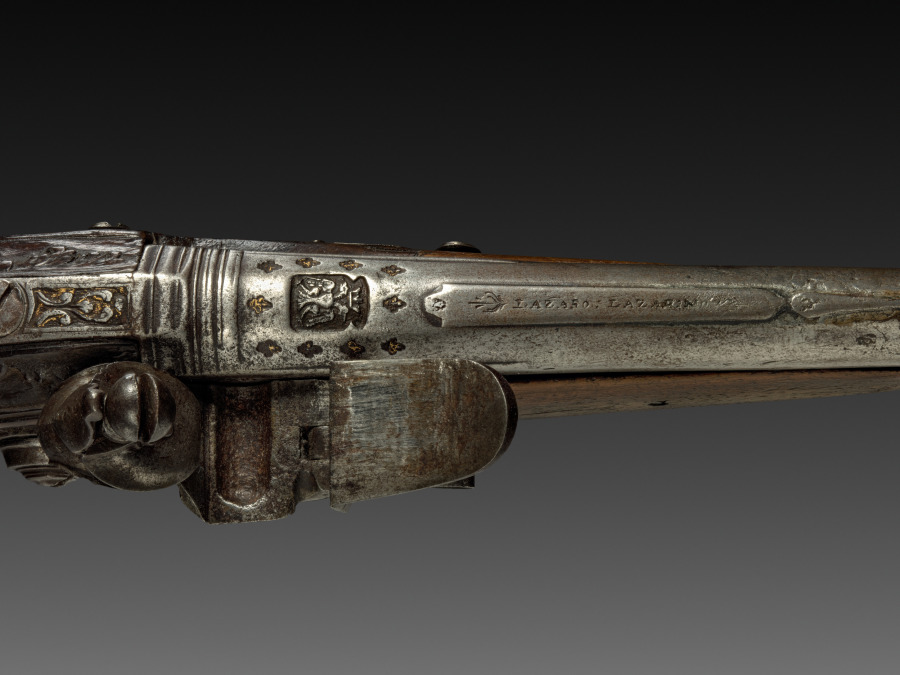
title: Flintlock Pistol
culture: Italy, Brescia, 18th century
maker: Bortolo Agazzi (Italian)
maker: Lazaro Lazarino (Italian)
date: 1700s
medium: steel with traces of gilding; walnut stock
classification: Arms and Armor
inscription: on lock: Bortolo Agazzi; on barrel: Lazaro Lazarino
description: The flintlock was the most popular style of lock in all of Europe in the mid 1600s through the 1700s except in Spain and Italy where the snaphance was more dominant. This pistol's shine comes from the gold that was applied to the steel shaft. This shiny surface is set off by the rich walnut stock. Upon close inspection, you can see areas of damage to the walnut and even a missing section of decoration on the rear of the handle.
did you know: The term flintlock is used to describe any firearm that uses a flint-striking ignition mechanism.